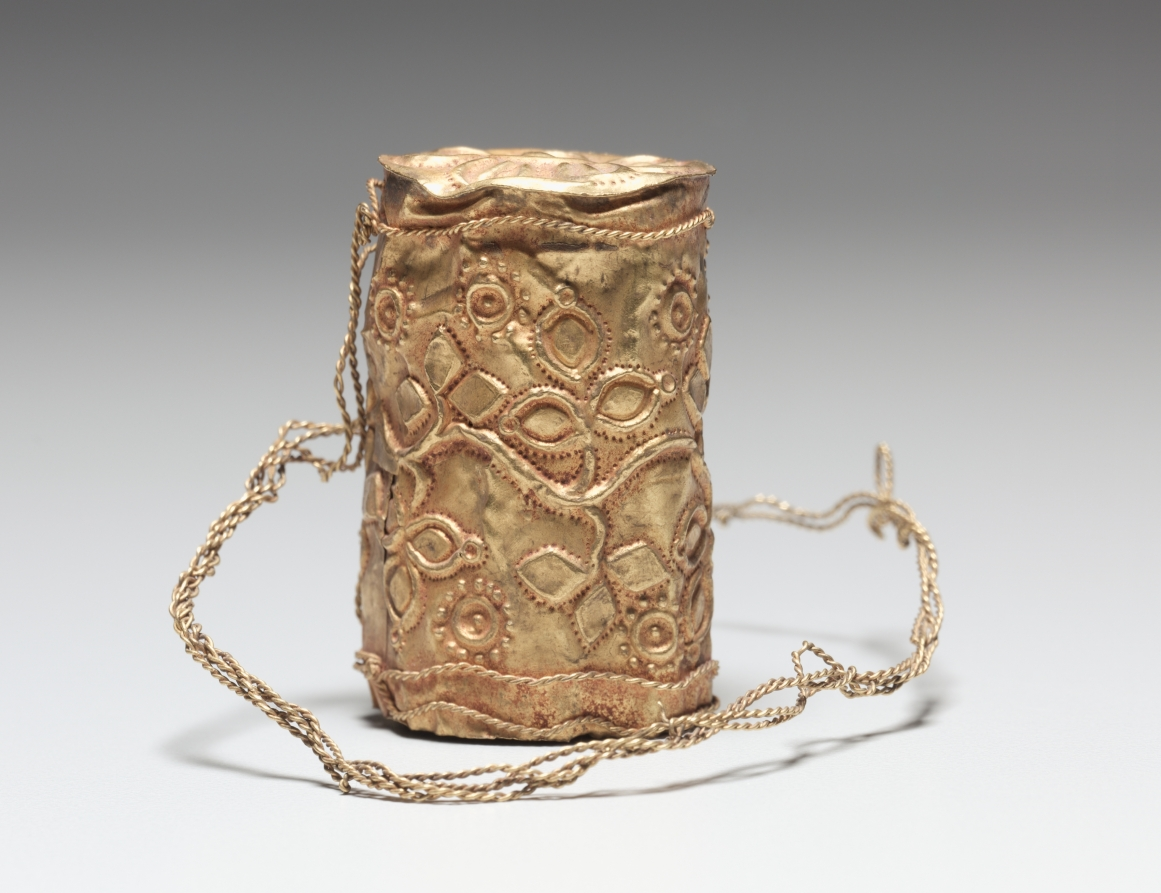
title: Knife Handle Cover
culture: Africa, West Africa, Ghana, Asante Empire/Kingdom, Kumasi or probably Kumasi, member of the goldsmiths' guild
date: 1800s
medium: Gold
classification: Arms and Armor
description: Gold sheaths covered the cast iron blade of a king’s ceremonial knife (sikay), wrapping them with symbolism. In Akan states like the Asante Kingdom, gold embodies life force (kra) and is the sun’s earthly counterpart. Only goldsmiths’ guild members could make gold ornaments for the royals and their entourage, or for the royal treasury. Here, the goldsmith used a tool to push the raised floral, leaf, and geometric designs from the back of a soft sheet of gold (repoussé technique). Small dots outlining some motifs were punched into the metal. Similarly decorated gold sheets and solid ornaments capped a knife’s handle.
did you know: Only members of the goldsmiths' guild, who claimed descent from the first goldsmith Fusu Kwabi, could make gold ornaments for the royals and their entourage.